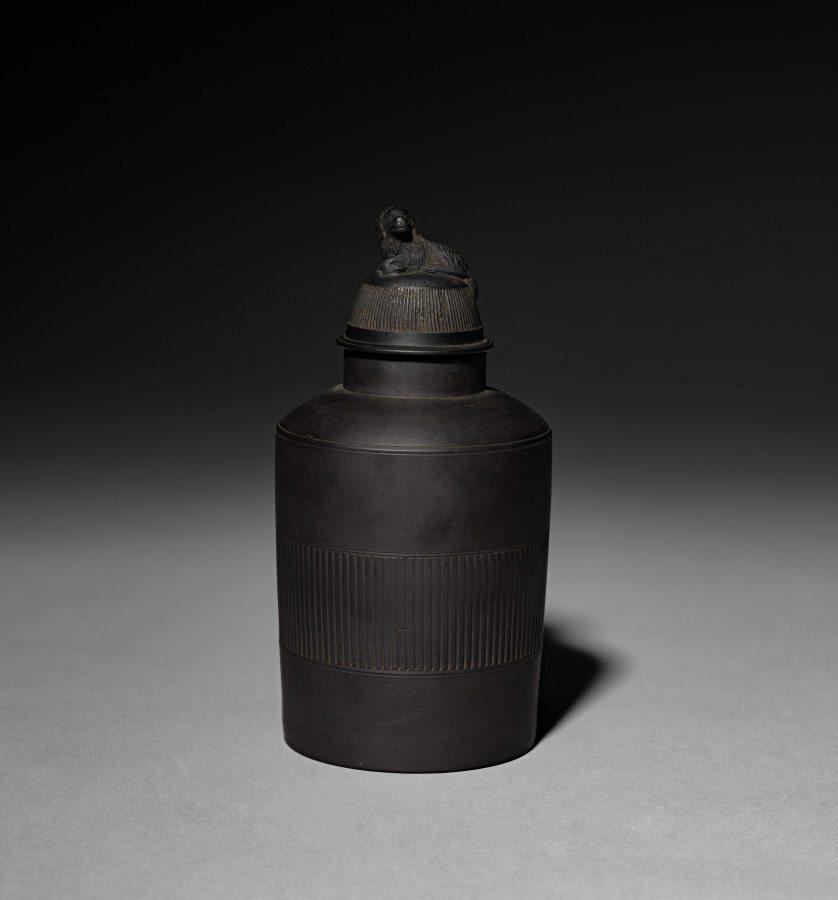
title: Tea Caddy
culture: England, Staffordshire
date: c. 1770–80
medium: Black basalt stoneware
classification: Ceramic